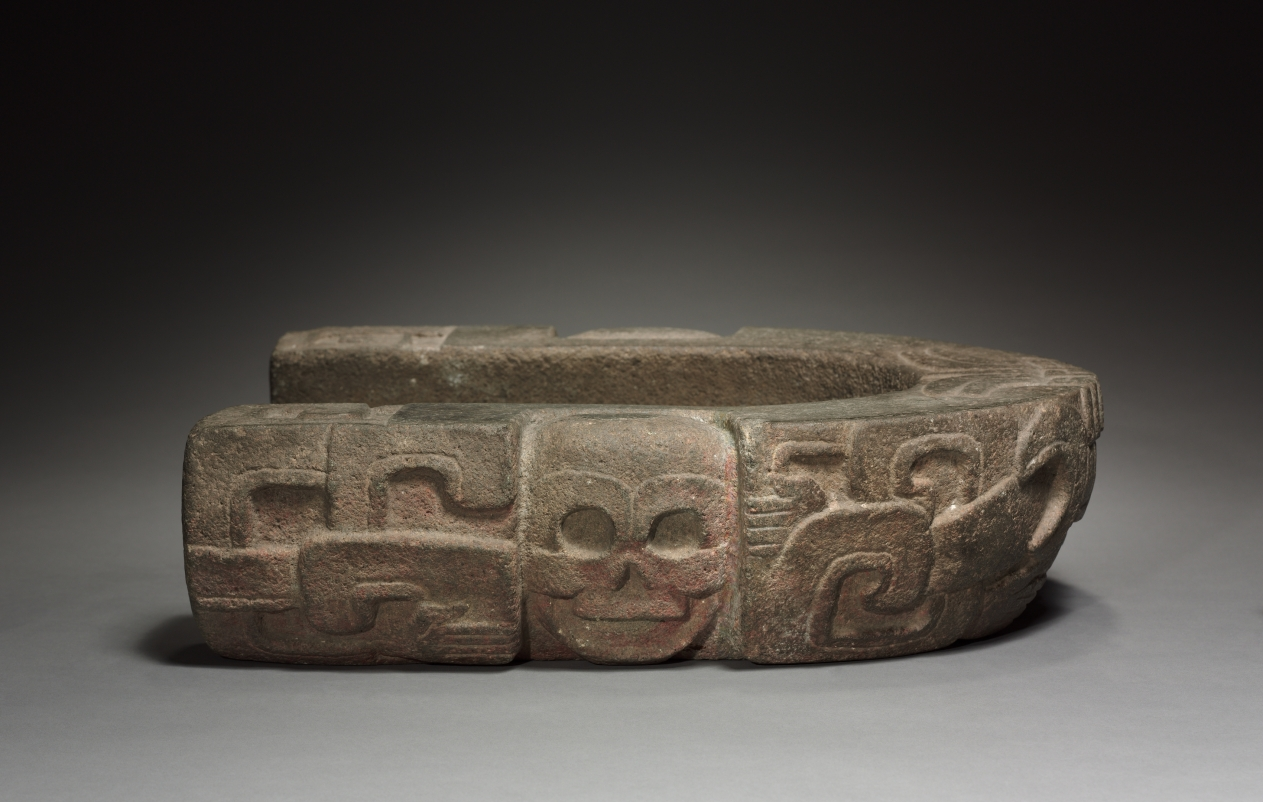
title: Yoke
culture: Mexico, Classic Veracruz Style, 7th-10th Century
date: c. 600–900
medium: stone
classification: Sculpture